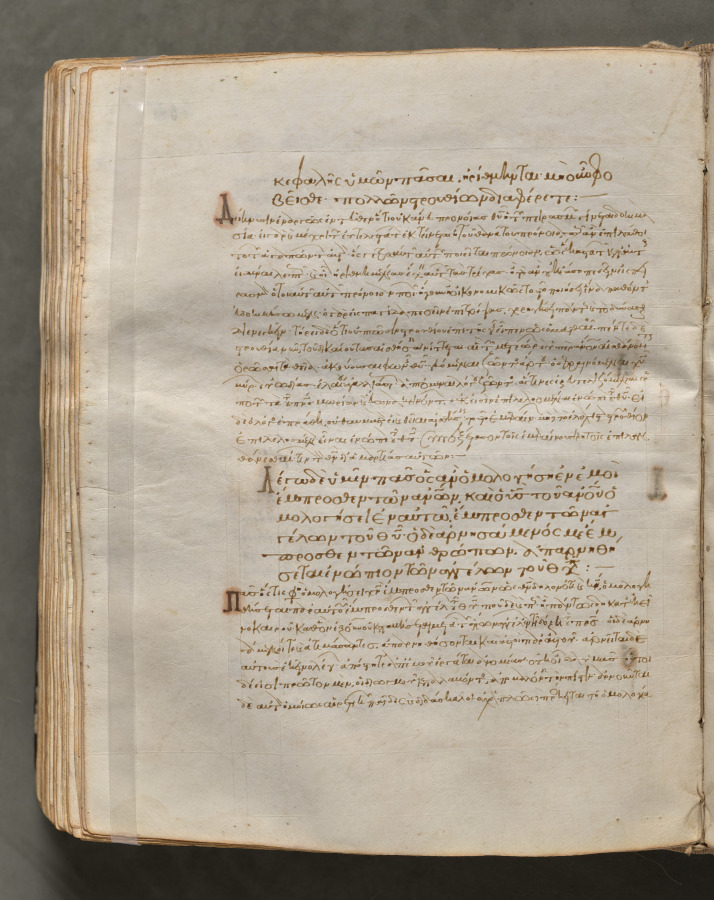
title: Text, folio 265 (verso), from a Gospel Book with Commentaries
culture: Byzantium, Constantinople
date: c. 1000–1100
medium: ink, tempera, and gold on vellum; leather binding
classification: Bound Volume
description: Each of the four gospels in this book opens on a page with brilliantly illuminated borders depicting the author of the text as well as birds—principally peacocks, symbols of the immortality of the soul—and fountains, representing the fountain of life and the salvation of the soul. This volume consists of 428 leaves with texts in Greek. Its level of sophistication suggests that it was probably written and decorated in a monastery in Constantinople.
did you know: Gospel books were carried in procession through Byzantine churches.